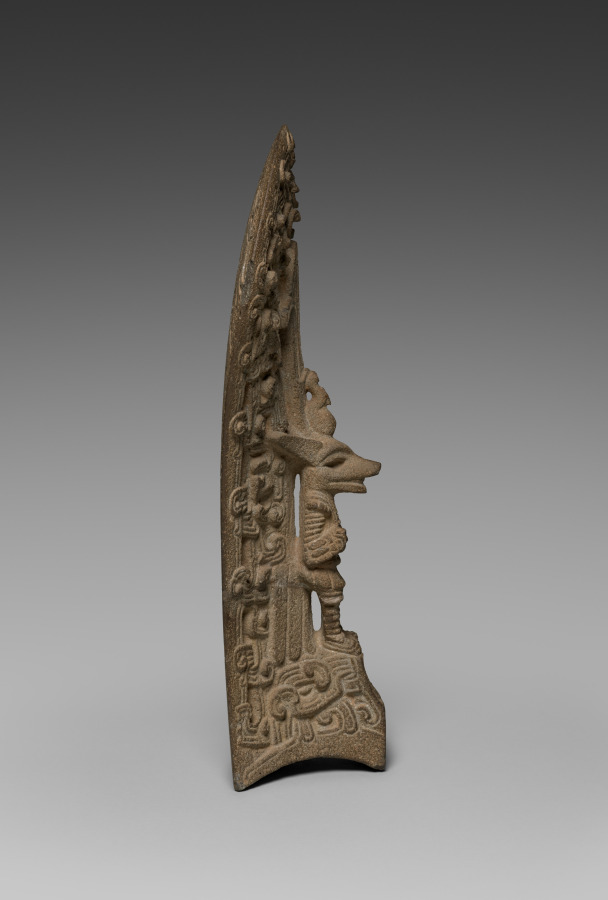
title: Ballgame Palma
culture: Mexico, Gulf Coast, Classic Veracruz style (600-1100)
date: c. 900–1100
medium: stone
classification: Sculpture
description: Stone palmas—so-called today for their palm frond-like shape—are ceremonial sculptures that may replicate lightweight gear worn over the chest during the ballgame. The scene on the back of this palma vividly illustrates the tie between the ballgame and sacrifice. A bat descends from the top, clutching severed human body parts, and at the center an upright figure brandishes a blade over a reclining victim. The scene's many animal figures, including the one on the front, may belong to ballgame mythology that now is lost.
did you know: The Mesoamerican ballgame was played with a hard rubber ball that players bounced off their hips.